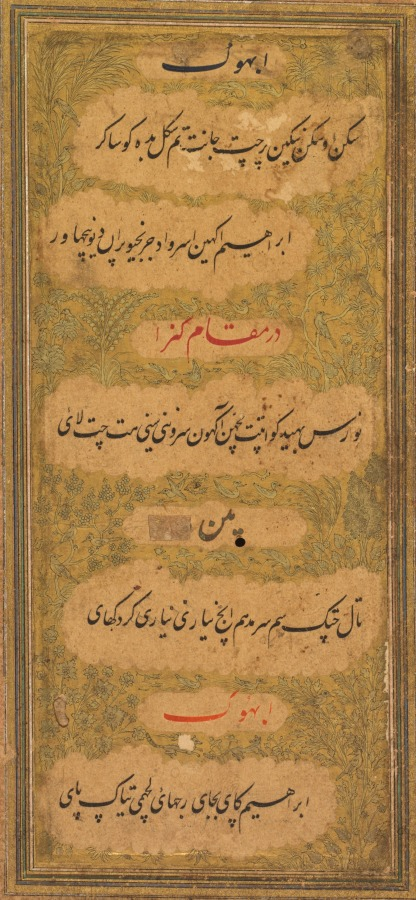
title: From Dohras (Songs) 40 and 42 from the Kitab-i Nauras (Book of Nine Essences) of Sultan Ibrahim Adil Shah II of Bijapur (r. 1580–1627); verso: From Dohras (Songs) 40 and 36 from the Kitab-i Nauras of Sultan Ibrahim Adil Shah II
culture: India, Bijapur, Deccan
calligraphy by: Khalilullah Butshikan (Persian, active in India 1596–c. 1620)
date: 1618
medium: ink with two-tone gold on paper, double-sided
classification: Painting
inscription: Deccani Urdu (Karnati) lyrics in nasta‘liq script: . . . because being itself a sea of knowledge, it could know good omens from the bad ones. Ibrahim is praying for its long life and prosperity. Give a patient hearing and listen to the description of the nine essences, which I am just giving to you. Its rhythm is chatak sam, its note is madhyam. It is very creative. Ibrahim sings and plays and attracts and forgets to have attachment to wealth and riches. (after Ahmad 1956, 116–17, 141–42); Verso: Deccani Urdu (Karnati) lyrics in nasta‘liq script: We are the true devotees of Shiva, and our devotion and attachment to him are daily towards increase. “Karnati” is a lady of surpassing beauty, with white complexion resembling kevra flower, is dressed in a blue sari and a yellow bodice. Her hands resemble the white esculent lotus in tenderness, and the eyes are similar to the ordinary lotus in attraction. It is the spring season, and the Indian cuckoo, sitting on the heavenly tree is vociferating. The lady who is suffering from the pangs of separation is advised not to be grieved, for her lover would soon arrive.” (after Ahmad 1956, 114–16, 140–42)